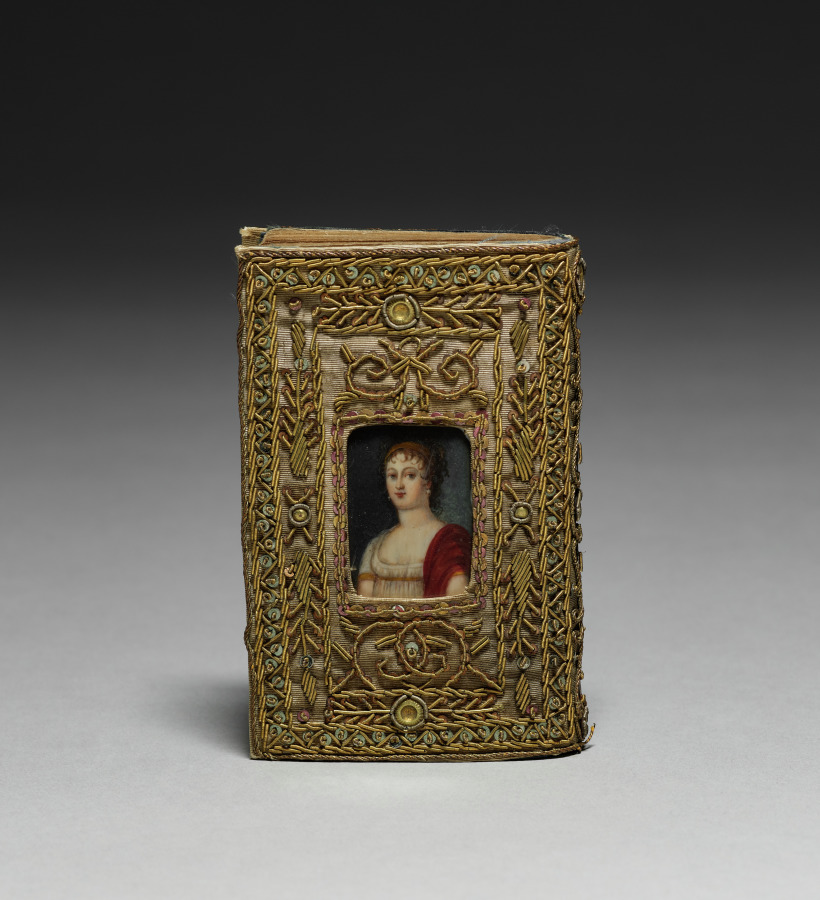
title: Book Bound in Silk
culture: France, 19th century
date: 1804–5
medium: silk, metal thread, reverse painted glass, paper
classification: Miscellaneous